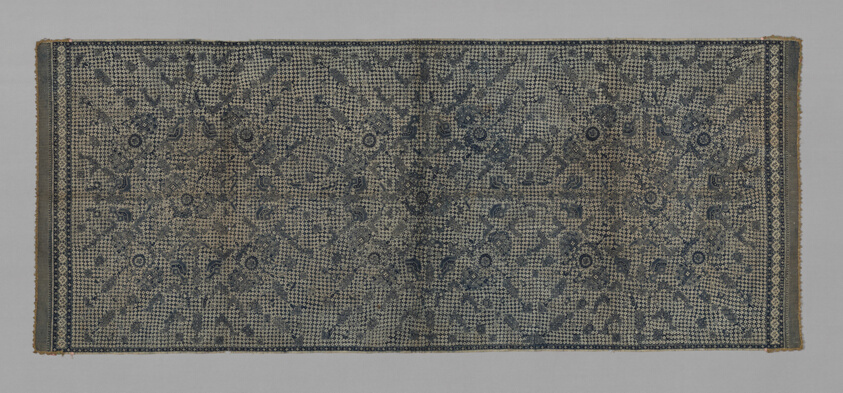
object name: Textile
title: Skirt Cloth (Kain panjang)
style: indonesian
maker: Pesisir; Indonesia, Central Java, Cirebon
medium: Cotton, plain weave; wax resist dyed (batik); edged with gilt-metal-strip wrapped cotton and silk, bobbin lace; and embellished with fragments of ----- and cotton, plain weave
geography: Java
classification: weaving - printed; textile